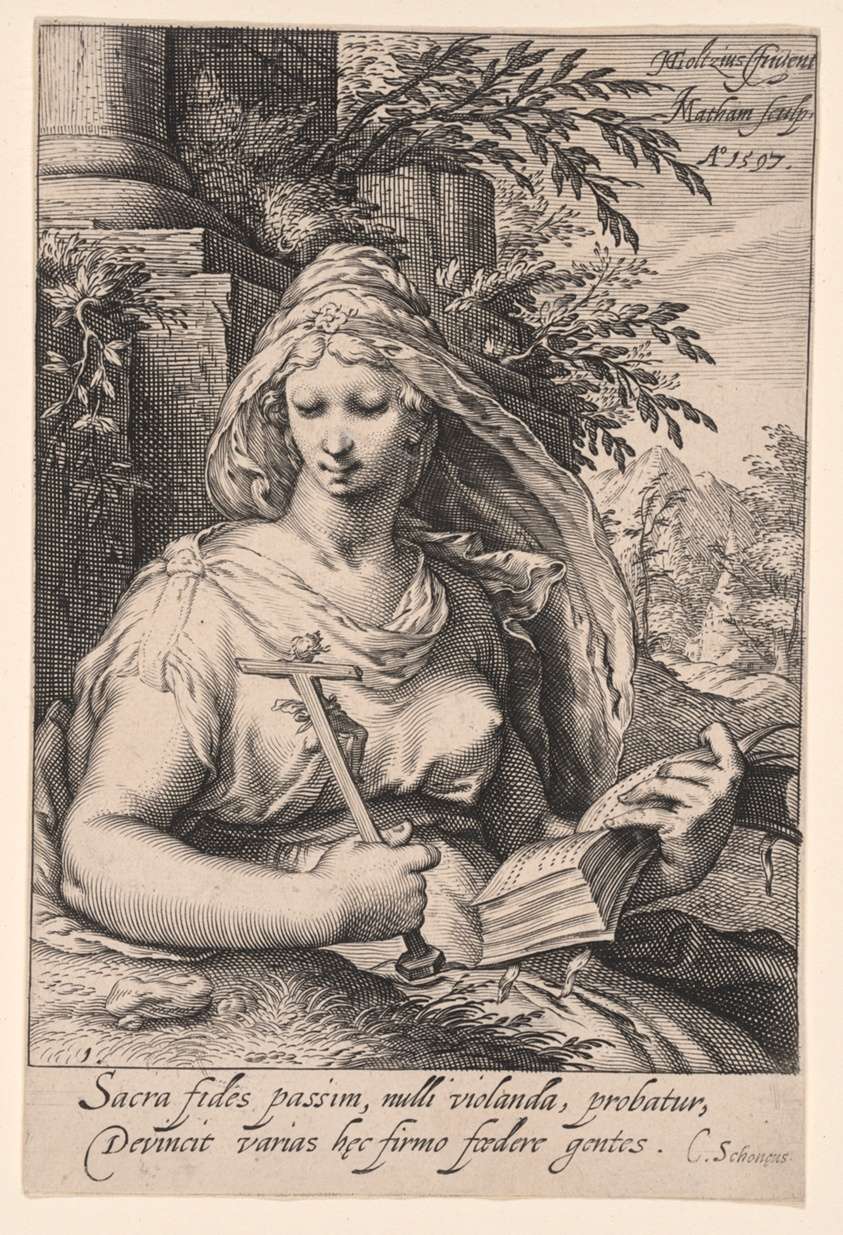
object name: Print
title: Faith, from The Seven Virtues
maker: Jacob Matham (Dutch, 1571–1631); after Hendrick Goltzius (Dutch, 1558–1617)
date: 1597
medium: Engraving on paper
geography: Netherlands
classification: engraving; paper; print; prints and drawing